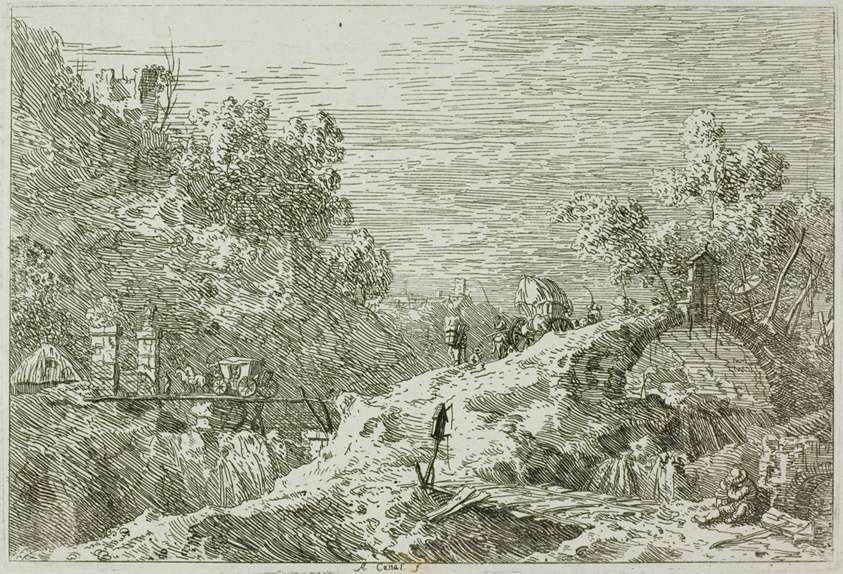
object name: Print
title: Mountain Landscape wih Five Bridges, from Vedute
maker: Canaletto (Italian, 1697-1768)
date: 1735/44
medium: Etching in black on ivory laid paper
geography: Italy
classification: etching; print; prints and drawing